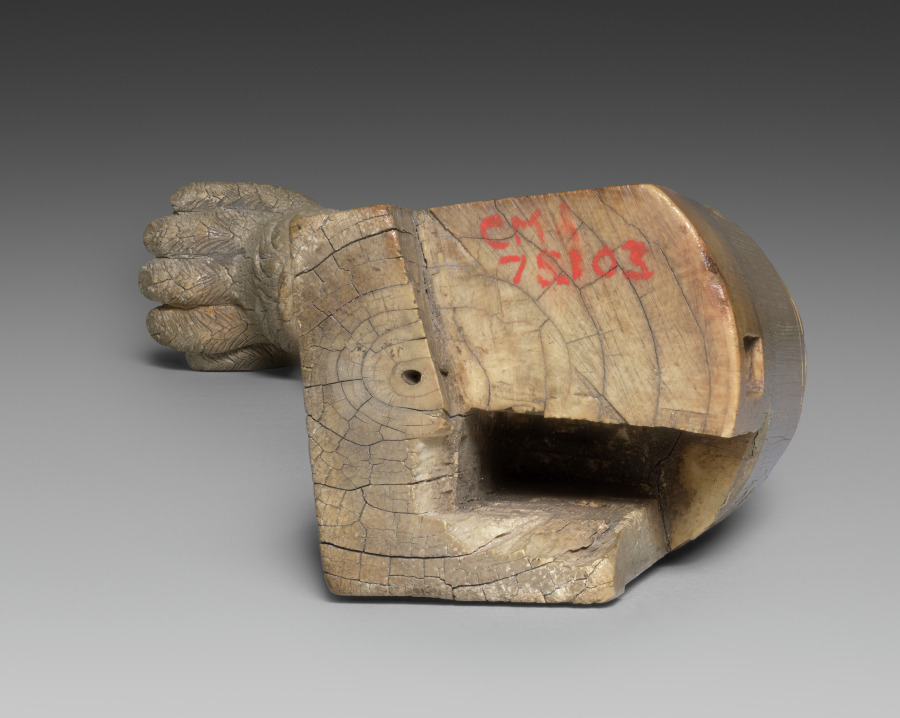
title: Chair Leg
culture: Afghanistan, Begram, Kushan period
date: 300s CE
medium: ivory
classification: Ivory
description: This ivory carving was made to sheath wooden furniture made in India for trade along the Silk Road, which stretched from Rome to China. Indian ivory-faced furnishings--along with lacquer boxes from China and painted glass from Rome--were found in an extraordinary deposit of luxury goods at a site called Begram. The wood on which the ivory and lacquer were affixed has long disintegrated, and only the small pieces remain.